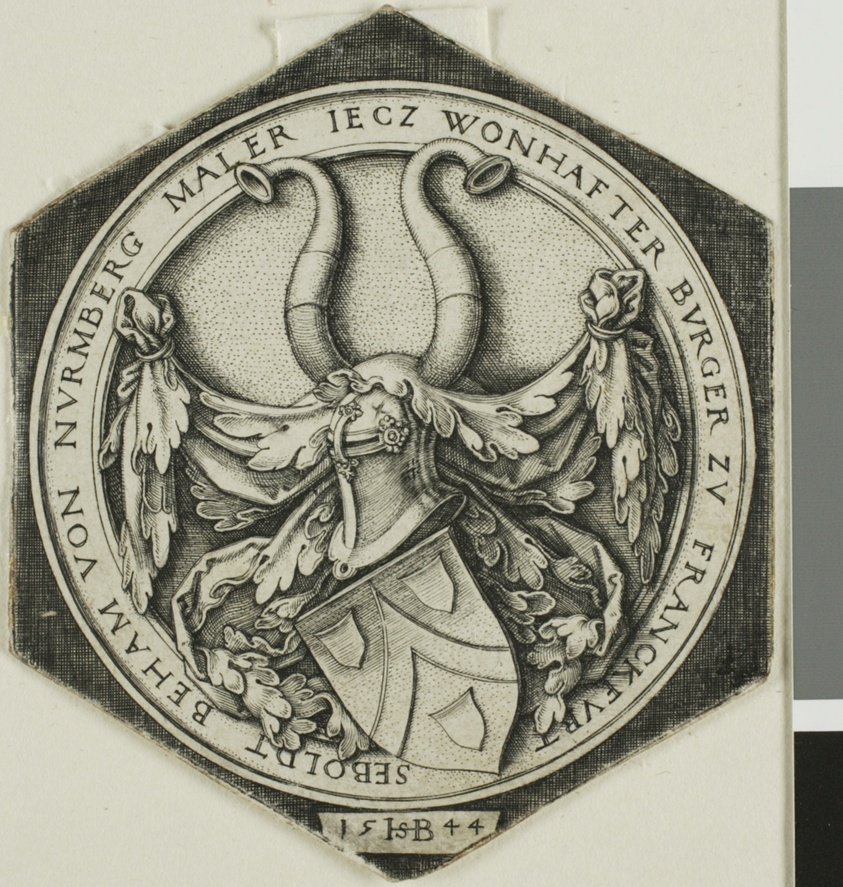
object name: Print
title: Coat of Arms of Sebald Beham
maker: Sebald Beham; German, 1500-1550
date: 1544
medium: Engraving in black on ivory laid paper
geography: Germany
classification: engraving; print; prints and drawing